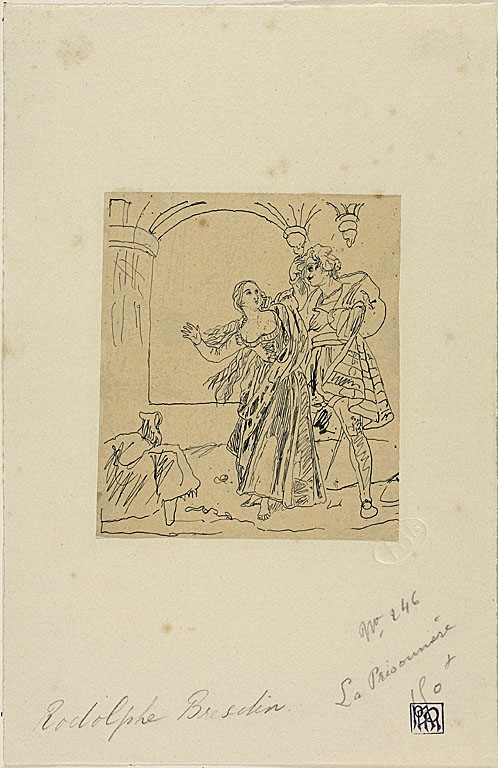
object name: Drawing and Watercolor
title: The Prisoner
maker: Rodolphe Bresdin (French, 1825-1885)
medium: Pen and black ink, on tan tracing paper, laid down on buff wove paper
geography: France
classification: pen and ink drawings; drawings (visual works); prints and drawing